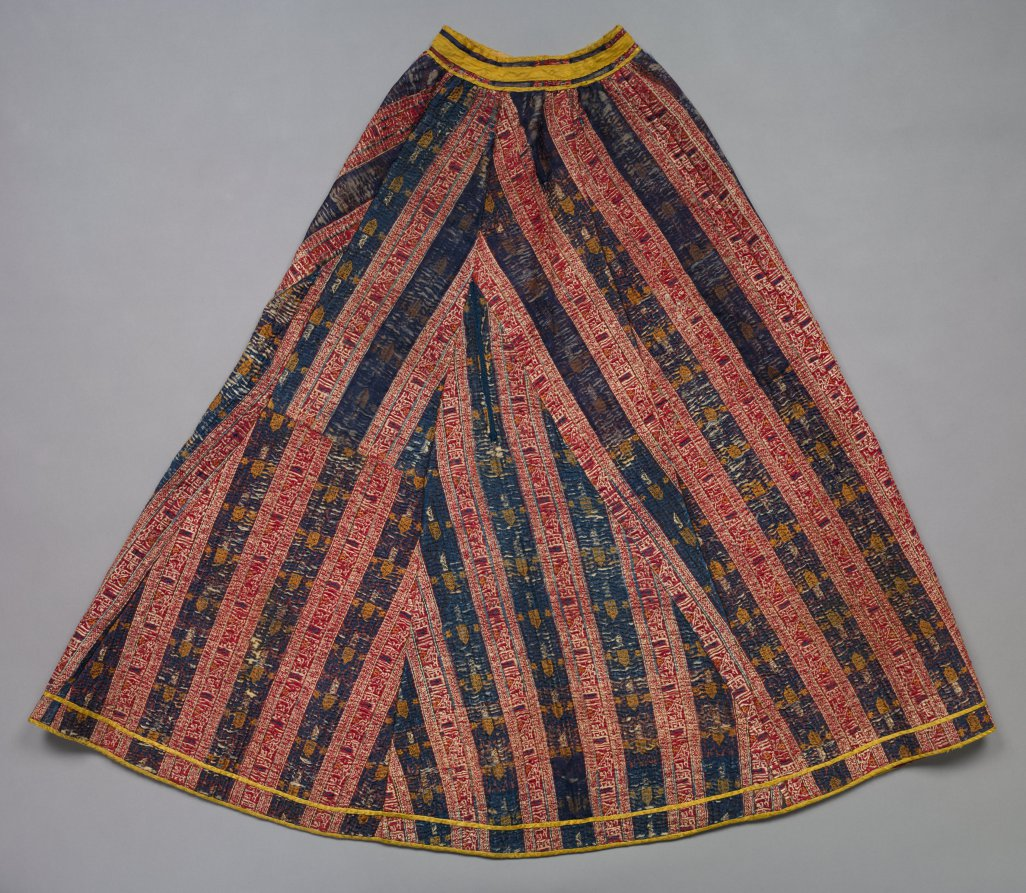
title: Mantle for a statue of the Virgin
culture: Spain, Granada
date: late 1400s–1500s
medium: Silk: lampas weave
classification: Textile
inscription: on red ground is Naskhi inscription "Glory to our Lord, the Sultan" in white.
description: A striped silk textile, probably made for use in the Islamic Alhambra palatine complex, was turned into a mantle for a statue of the Virgin Mary. On the crimson stripes the salutation that occurs as ornamental text throughout the Alhambra, Glory to our Lord the Sultan, repeats in Arabic script.